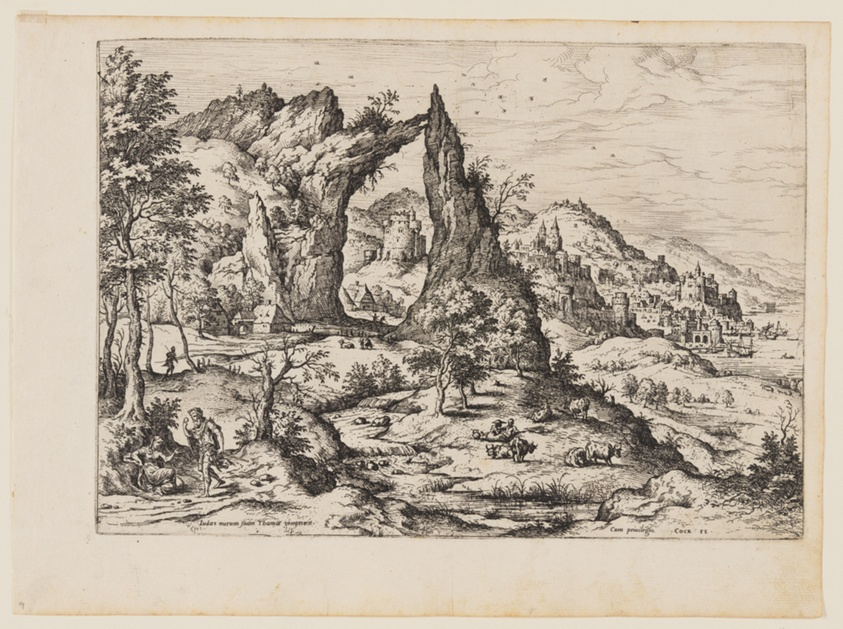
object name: Print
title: Juda and Tamar, from Landscapes with Biblical and Mythological Scenes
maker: Hieronymus Cock (Netherlandish, c. 1510–1570); after Matthys Cock (Netherlandish, c. 1505-1548)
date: 1558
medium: Etching on ivory laid paper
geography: Netherlands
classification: etching; paper; print; prints and drawing